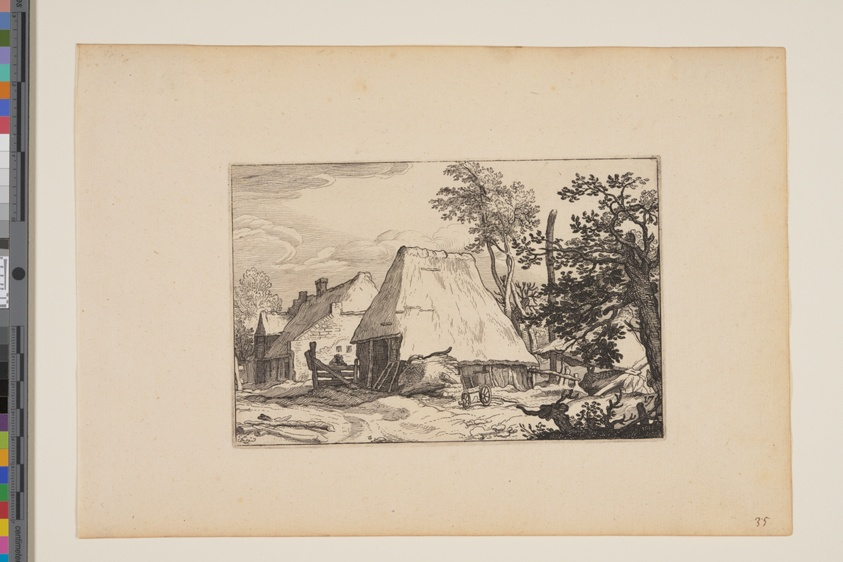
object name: Print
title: Farmyard, Man Resting on a Fence left of Centre, from Landscapes (Verscheyden aerdige Lanthuysen...)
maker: Claes Jansz. Visscher (Netherlandish, c. 1550–c. 1612); after Abraham Bloemaert (Dutch, 1566–1651)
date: 1620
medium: Etching on ivory laid paper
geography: Netherlands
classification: print; paper; prints and drawing; etching